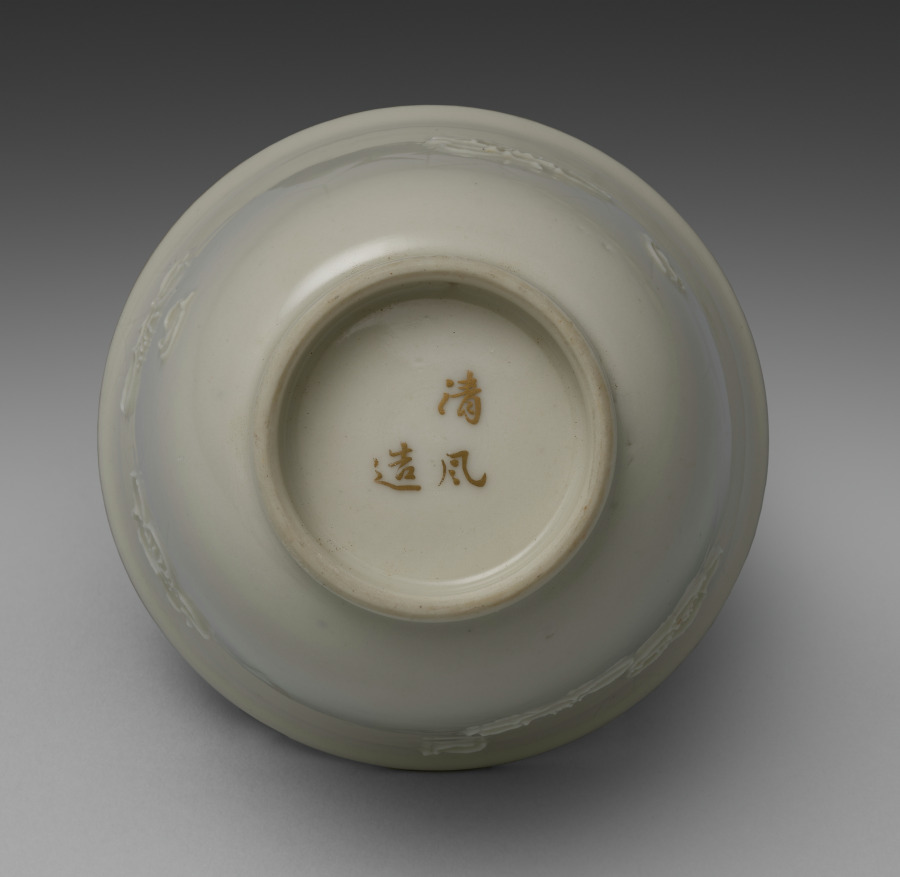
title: Drinking Cup from Dining Set with Plum Blossoms and Cracked-Ice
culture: Japan, Meiji period (1868–1912)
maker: Seifū Yohei II (Japanese, 1844–1878)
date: c. 1875–78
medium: Porcelain with molded designs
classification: Ceramic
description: Each item in this set has a delicate low-relief design of flowering plum branches over scattered, intersecting lines meant to resemble the cracked-ice surface of a frozen body of water and is signed on the base in gold pigment. While Yohei II produced many fine works in underglaze blue, like those produced by Kiyomizu Shichibei, he also made works in quite different styles later in his career, from the early 1870 s. In 1873, he was appointed purveyor to the Industrial Center of Kyoto Prefecture, a designation associated with Kyoto’s efforts to reach an international market through the port of Kobe; and from 1875 until his death, he was involved in national-level projects to present Japanese ceramics across the world. It was during this period that Yohei III was apprenticed to Yohei II, and it has been suggested that this set may in fact be an early example of Yohei III’s work, which he signed with his teacher’s name. Decorated with flowers resembling Japanese textile motifs, the set calls to mind the design of Yohei II’s pair of vases with plum blossoms in the Victoria and Albert Museum. Here, the elaborate trees created for a formal public exhibition setting have been translated into the approachable blossoms of the genteel domestic environment. While the designs are consistent across the pieces, each raised flower petal and pistil and each incised line in the ice was done by hand, so the cups, bowls, and dishes are similar yet unique. The bottoms of two boxes once identified the set’s owner, but the information has been deliberately obscured with black ink. However, inscriptions still visible appear to indicate two occasions, once at the end of July 1886 , and once again in June 1916 , when parts of the set were requested from Hokura in Niigata Prefecture. The location corresponds to a neighborhood in the present-day city of Jōetsu. The surname Tsuji 辻 also appears on a paper tag affixed to one of the box cloths. Future research may possibly reveal more about their provenance. A vase by Yohei III in a private collection combines the formal grandeur of the Yohei II vases in the Victoria and Albert Museum with the gentler design of this dining set, placing flowering plum trees against soft, scalloped-edge clouds resembling those in golden screens.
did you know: The dining wares have a creamy white coloration that the four boxes containing them identify as Korean in style.